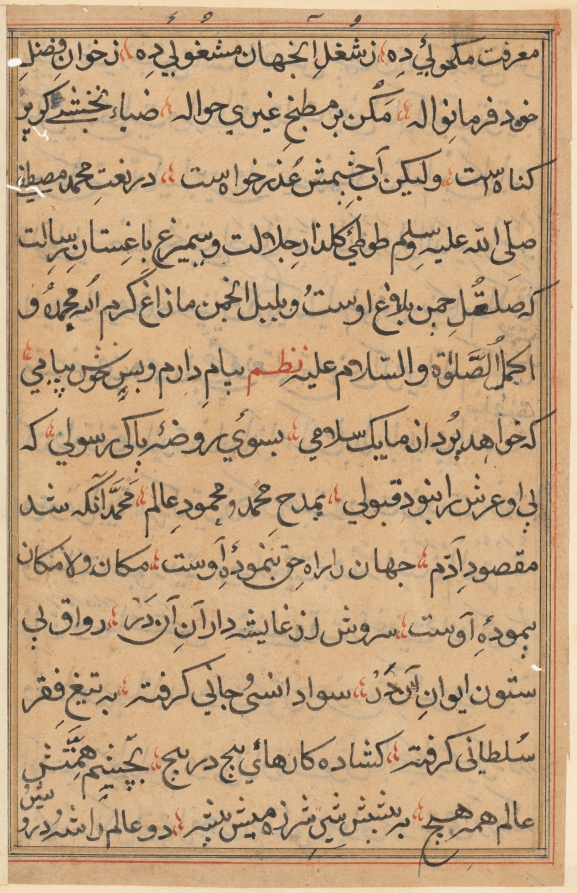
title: Page from Tales of a Parrot (Tuti-nama): text page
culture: Mughal India, court of Akbar (reigned 1556–1605)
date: c. 1560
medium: gum tempera, ink, and gold on paper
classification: Painting